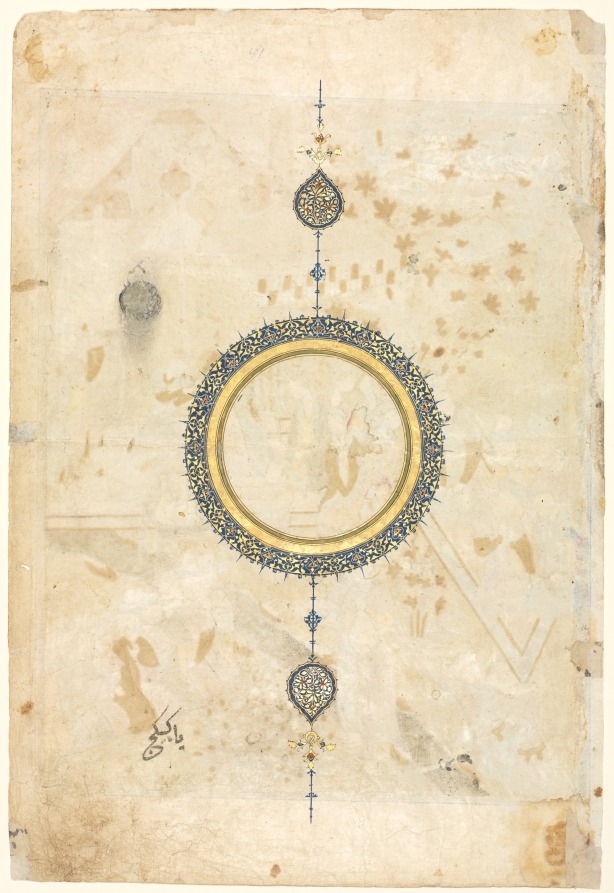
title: Shamsa (recto) from right folio from a double-page frontispiece of a Shahnama (Book of Kings) of Firdausi (940–1019 or 1025)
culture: Iran, Shiraz, Timurid period (1370-1501)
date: c. 1444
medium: opaque watercolor and gold on paper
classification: Manuscript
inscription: Yā kabīkaj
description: At the center of the recto side of this folio is a shamsa, or sunburst, an exquisite symmetrical pattern of floral and geometric shapes painted in precious pigments and gold to reference divine light. The shamsa might have been intended to contain a name or portrait identifying the manuscript’s original owner, but in this case it is empty.